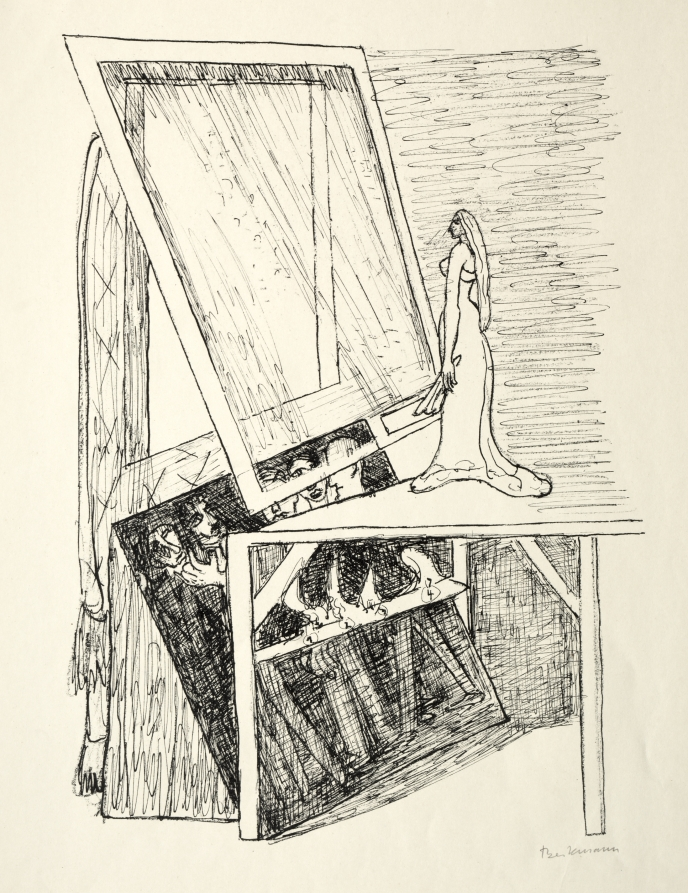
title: Day and Dream: Magic Mirror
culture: Germany, 20th century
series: Plate 13 of Day and Dream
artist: Max Beckmann (German, 1884–1950)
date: 1946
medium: lithograph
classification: Print